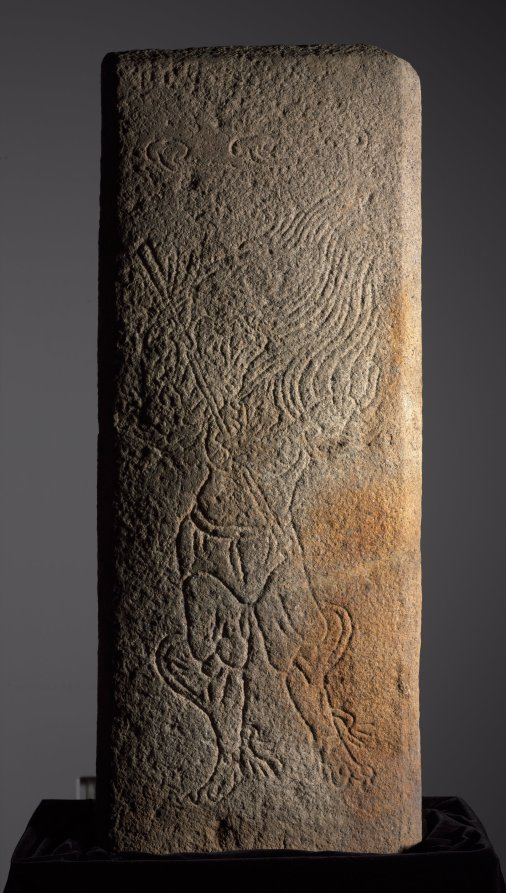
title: Stone Panel for Royal Tomb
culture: Korea, Unified Silla period (676-935)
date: late 700s-early 800s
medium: granite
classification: Sculpture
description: This panel shows a figure with a human body and the features of a rat, which is one of the signs of the Asian zodiac, and is likely one of 12 granite panels from a royal tomb. It is probably from Gyeongju—the capital of the kingdoms of the Silla (57 BCE–668) and Unified Silla (688–935) periods—where large royal tomb mounds can still be found. This panel resembles those showing the animal signs of the Korean zodiac from the tomb of General Kim Yusin (595–673) in Gyeongju, the most famous tomb of the period.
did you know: A rat, one of the signs of the East Asian zodiac, carved in this stone panel symbolizes wealth.